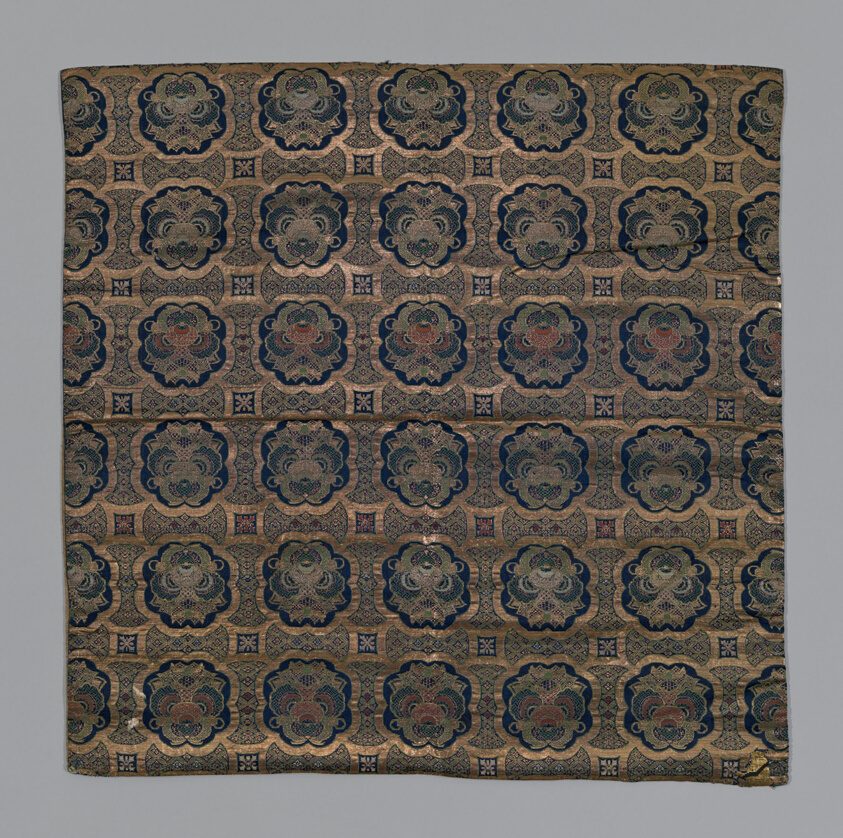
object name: Religious/Ritual Object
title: Uchishiki (Altar Cloth)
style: Japanism, asian, edo (japanese period)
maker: Japan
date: Edo period (1615–1868), 1775/1800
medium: Square piece of Kinran; fancy compound satin of silk threads and gilded paper strips finely cut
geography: Japan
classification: textile; weaving; ritual objects